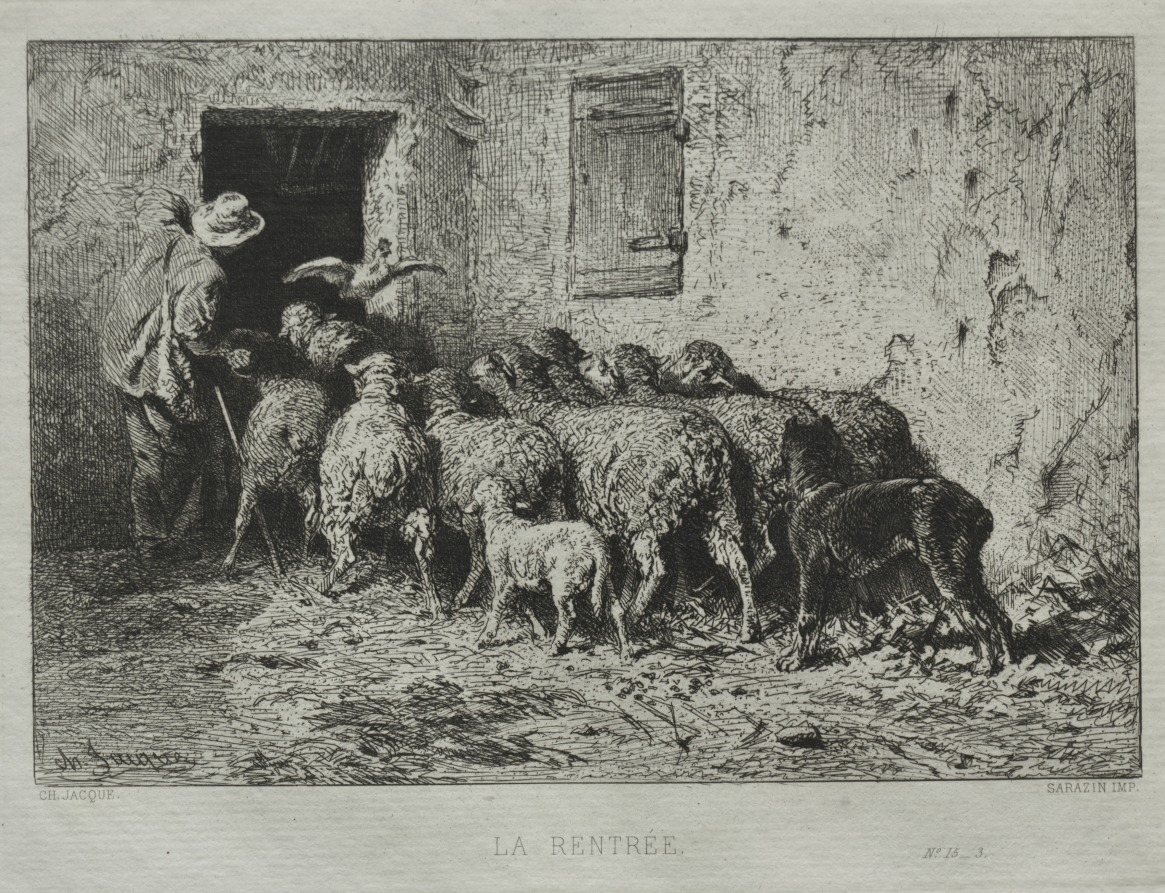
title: The Return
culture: France, 19th century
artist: Charles-Émile Jacque (French, 1813–1894)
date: 1864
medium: etching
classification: Print